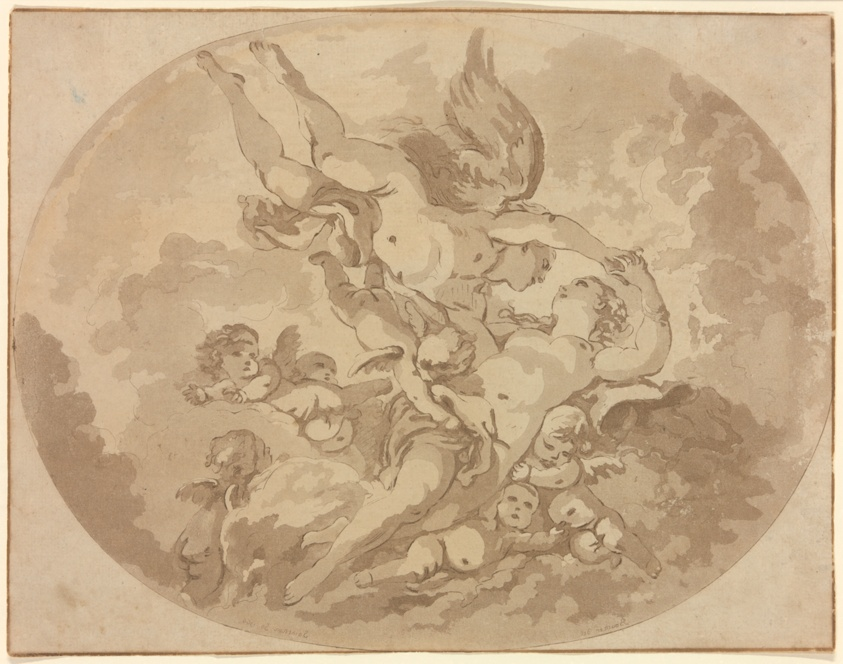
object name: Print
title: Cupid and Psyche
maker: Jean Claude Richard de Saint-Non (French, 1727-1791); after François Boucher (French, 1703-1770)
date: 1766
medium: Counterproof of aquatint in reddish-gray on ivory laid paper, ruled in pen and brown ink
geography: France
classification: print; aquatint; paper; prints and drawing